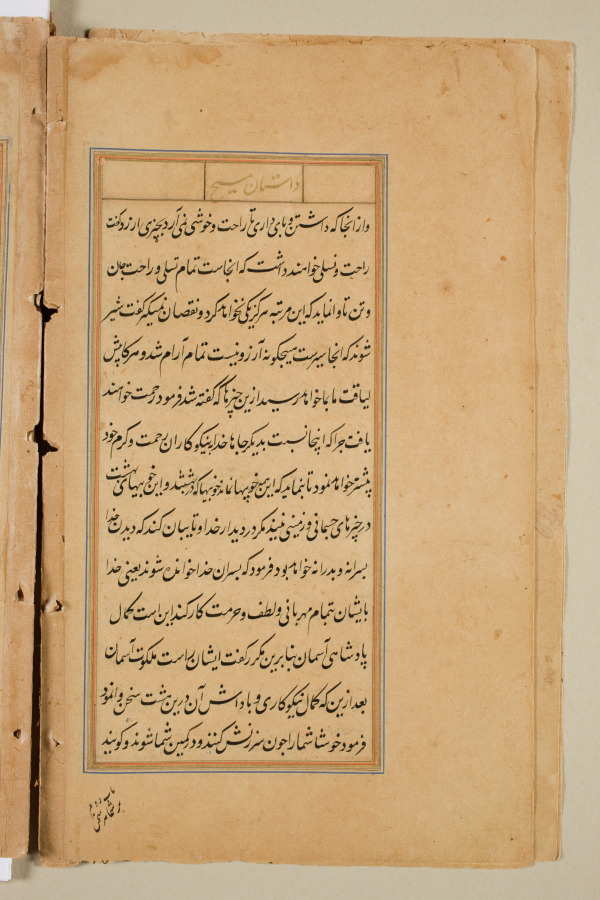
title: Text page from a Mirror of Holiness (Mir’at al-quds) of Father Jerome Xavier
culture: Mughal India, Allahabad, made for Prince Salim (1569–1627)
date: 1602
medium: Ink and gold on paper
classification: Manuscript